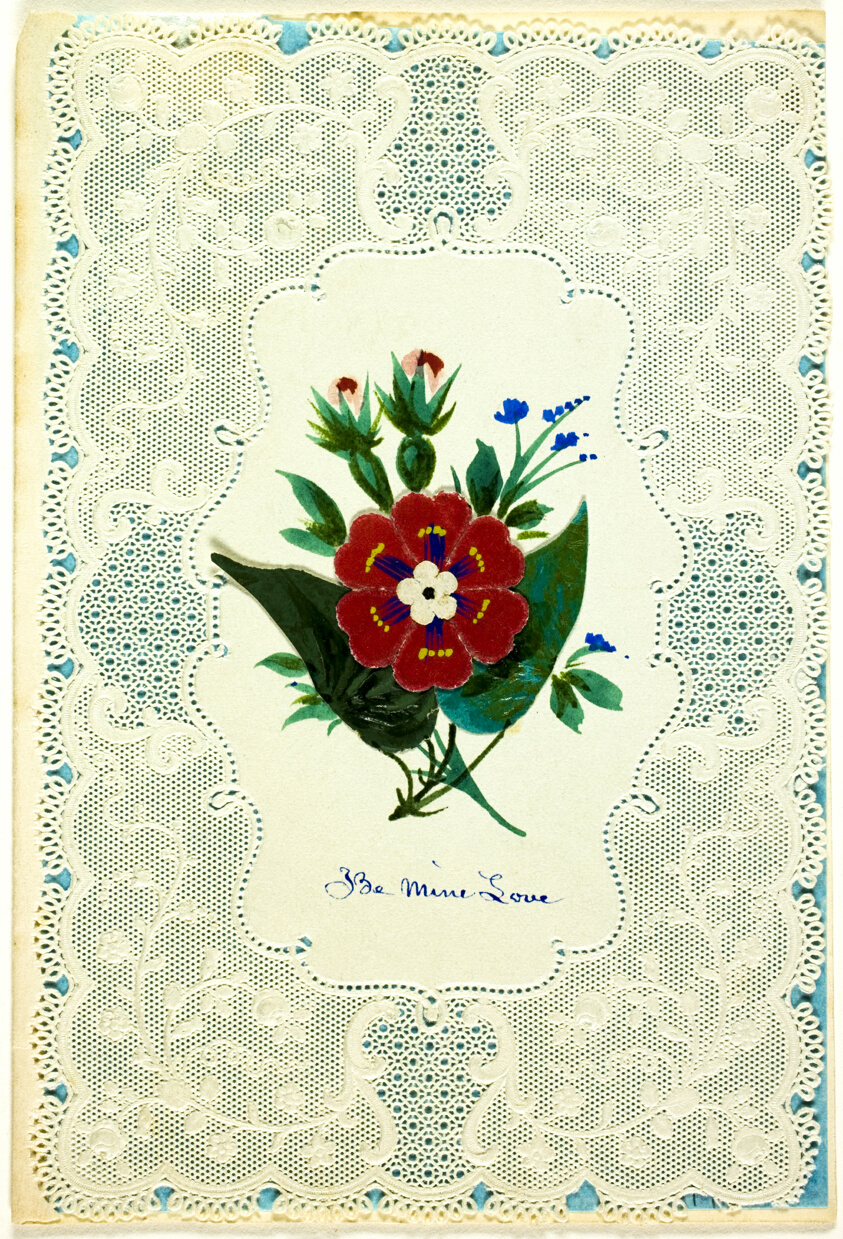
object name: Drawing and Watercolor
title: Be Mine Love (Valentine)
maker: Unknown Artist; English, 19th century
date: c. 1840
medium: Collaged elements and watercolor, with pen and blue ink on cut and embossed ivory wove paper (lace, folded), with blue wove paper insert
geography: England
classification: valentine; prints and drawing; paper